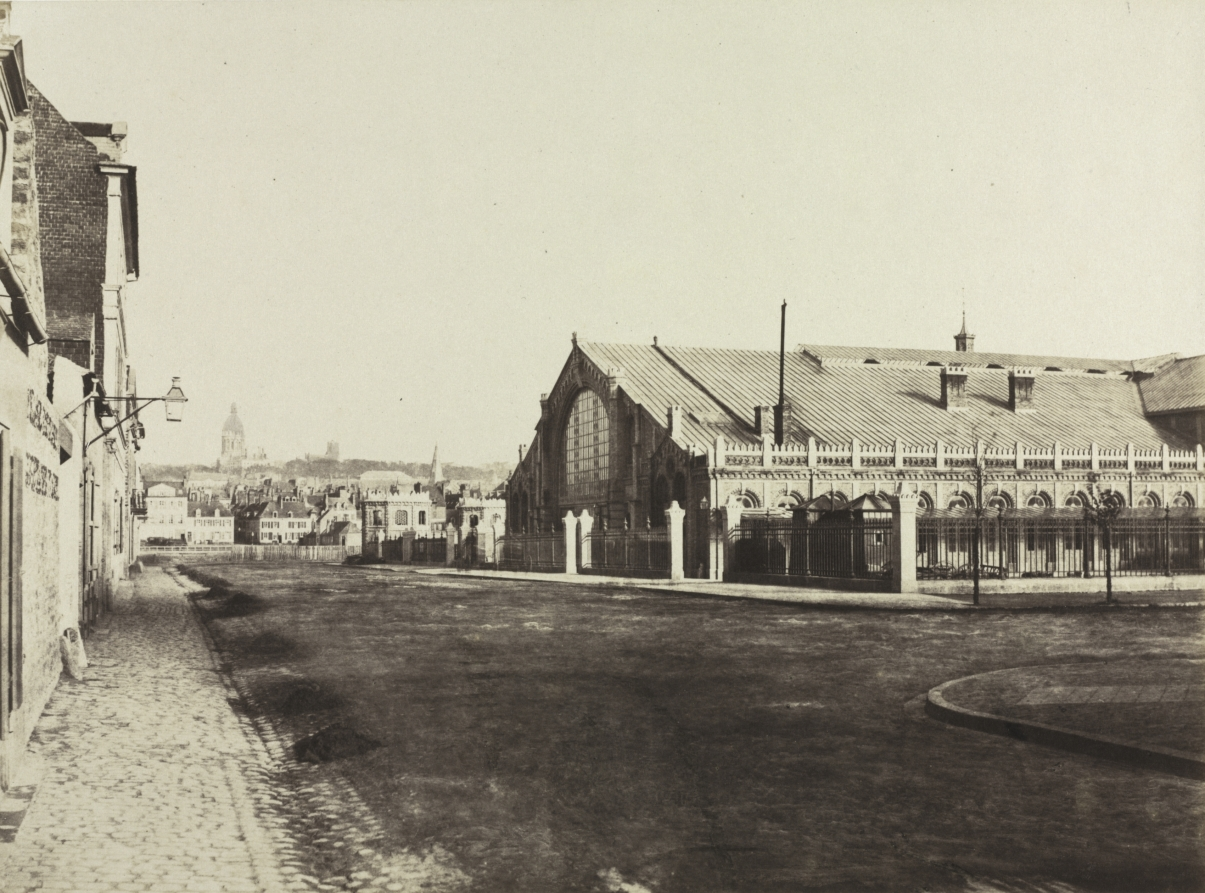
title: South Gable of the Boulogne Railway Station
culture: France, 19th century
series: Chemin de fer du Nord. Ligne de Paris à Boulogne Vues Photographique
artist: Édouard Baldus (French, 1813–1889)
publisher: Baron James de Rothschild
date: c. 1855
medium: salted paper print, albumenized, from waxed paper negative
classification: Photograph